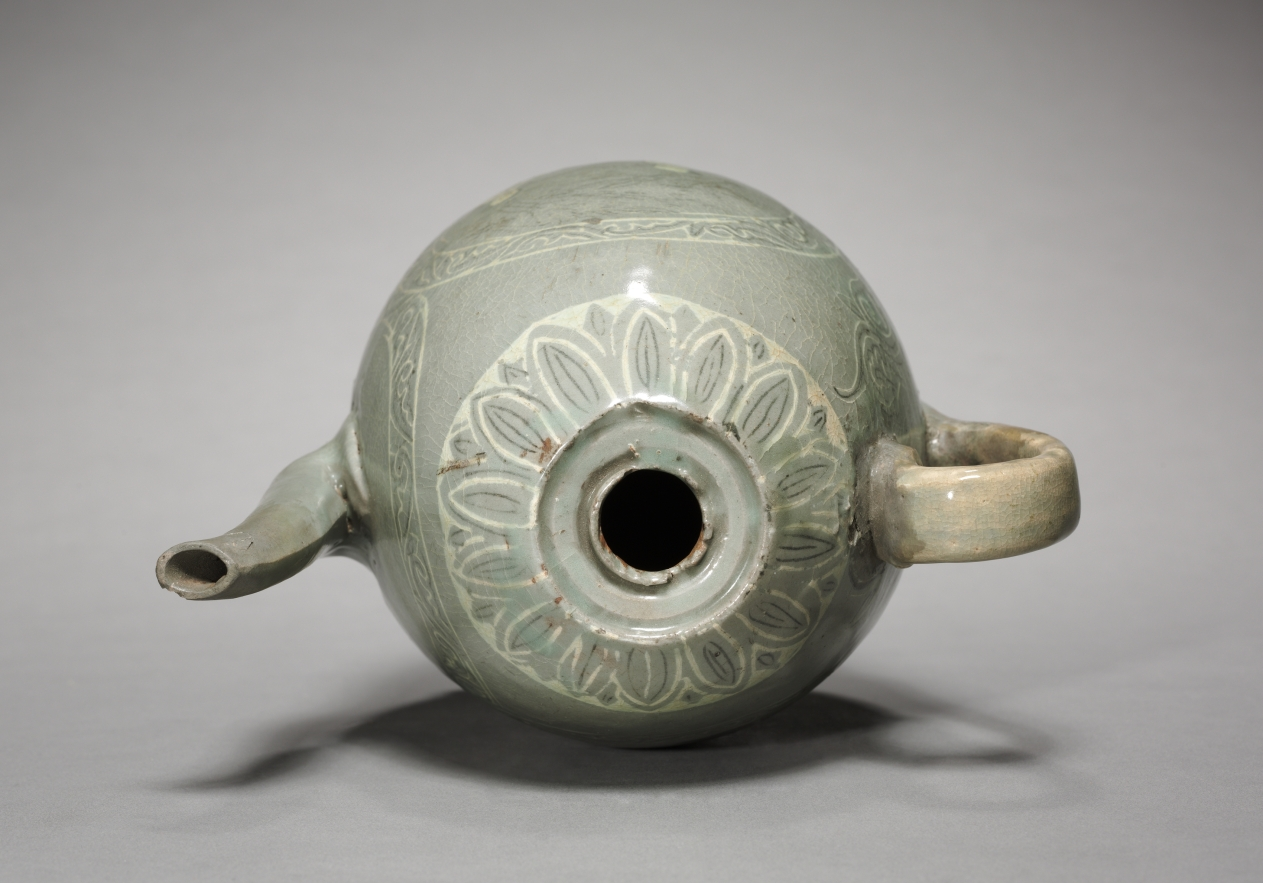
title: Pitcher with Inlaid Figure and Willow Design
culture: Korea, Goryeo dynasty (918–1392)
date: 1200s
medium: celadon ware with inlaid white and black slip decoration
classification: Ceramic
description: Representations of the elite’s elegant gatherings also appear on craft art designs, particularly depictions of the four accomplishments celebrated as cultivated pastimes by the scholar-literati elite—that is, playing stringed instruments and chess, and practicing calligraphy and painting. The image on this rare Korean inlaid celadon of two figures sitting together under a tree is comparable to renderings featuring the accomplishment motif of playing chess, or baduk in Korean.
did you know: As one of the oldest board games invented in China, this East Asian chess is still played in international competition venues.